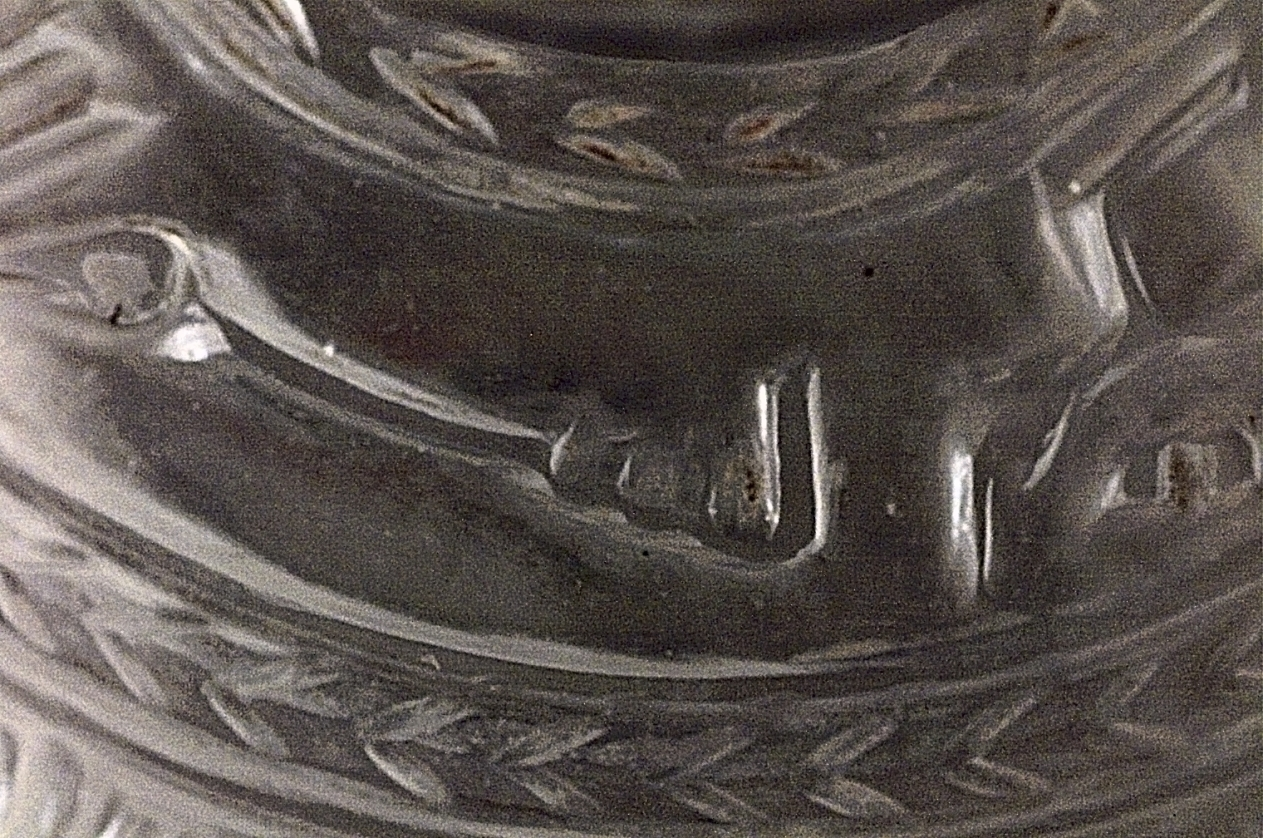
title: Hookah Bowl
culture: India, Mughal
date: 1700s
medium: glass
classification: Glass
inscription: Inscription in Farsi, on body: Even if live charcoal is placed on its head/ The hookah, a teacher of etiquette,/ will not respond unless drawn upon;/ Thus one can learn from its manners of refinement.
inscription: Inscription in Farsi, on shoulder: In the name of Allah the clement and merciful is the key to the wise treasure.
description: The inscription around the body of the base speaks to the use of the hookah in the decadent life of the Mughal court. The hookah is commended for being a proper, refined servant who will not “respond unless drawn upon” or, produce water bubbles when smoke is drawn through the hose. Undoubtedly the witty, poetic allusions would have been appreciated at banquets and other courtly gatherings. The use of wheel-cut glass for this hookah base may have been influenced by English glass and lead crystal that was exported to India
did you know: Around the top of this hookah bowl are incised the opening two lines from the Khamsa (Quintet) of the celebrated Persian poet Nizami (1141–1209).